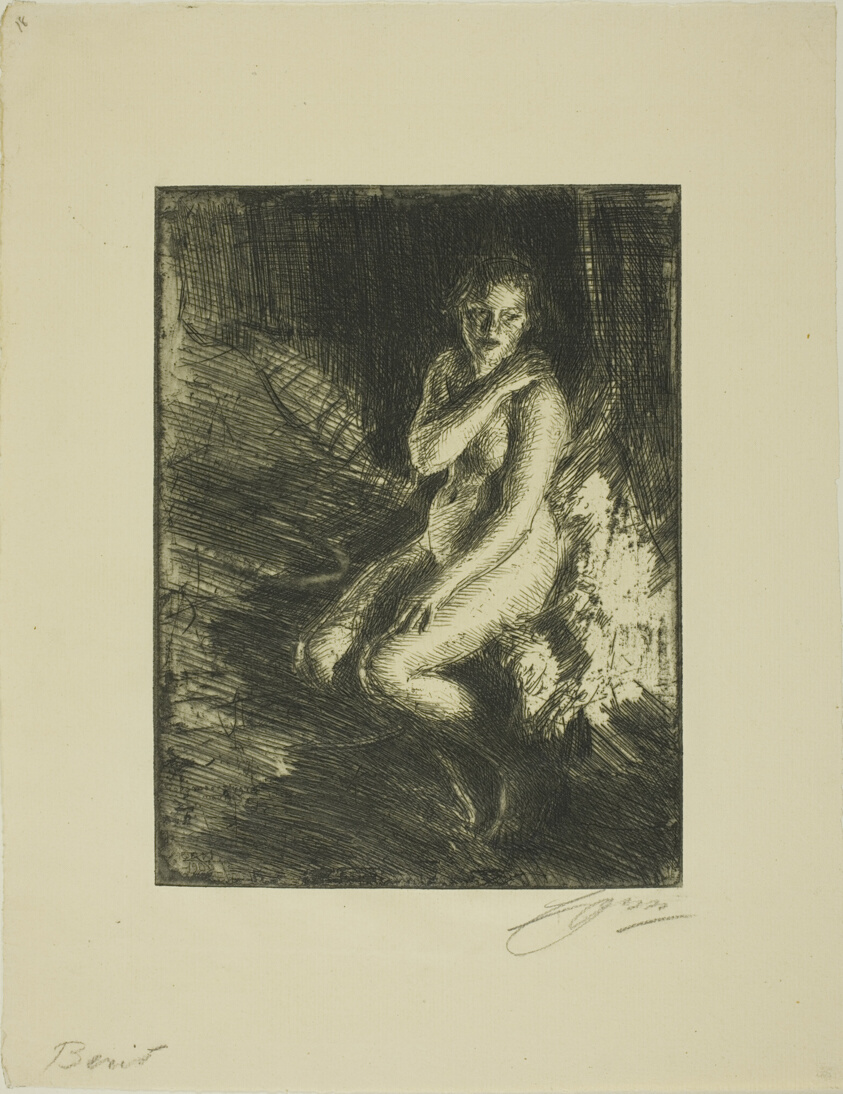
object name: Print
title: Berit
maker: Anders Zorn (Swedish, 1860-1920)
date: 1905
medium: Etching on ivory laid paper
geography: Sweden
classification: etching; print; prints and drawing